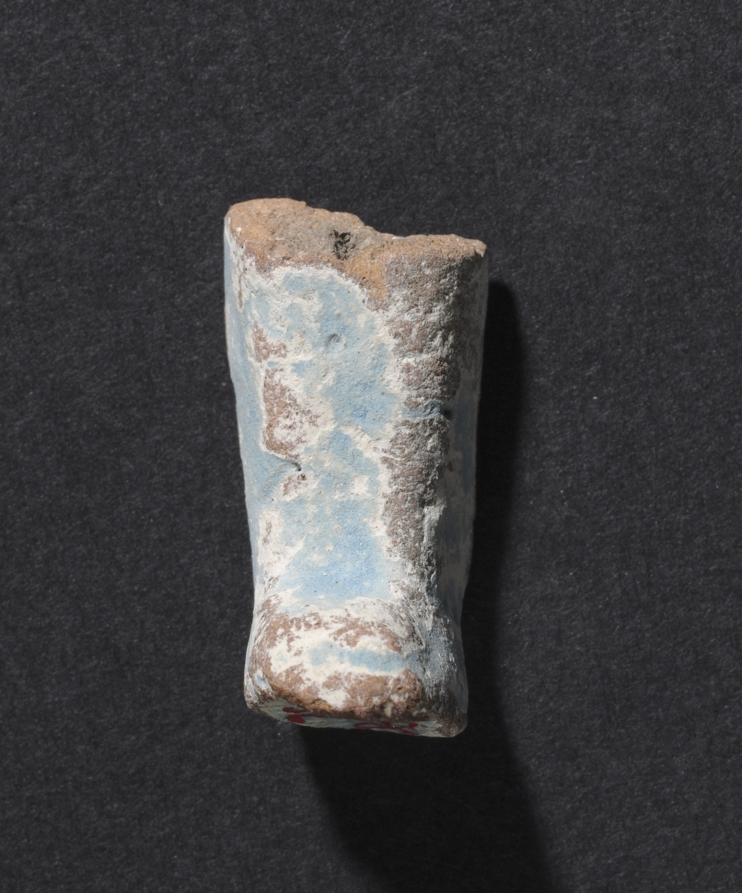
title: Shawabty of Ditamenpaankh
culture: Egypt, Late period (715–332 BCE), Dynasty 25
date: 715–656 BCE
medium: terracotta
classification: Funerary Equipment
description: High demand for shawabtys in the Late Period, a time when as many as 400 or more shawabtys were placed in the tomb with the deceased, gave rise to a specialized container for storing them: the shawabty box. This example is inscribed for the lady of the house, Ditamenpaankh, and was probably one of a pair originally made for her. The single-masted boat on the box's lid is perhaps an allusion to the pilgrimage of the deceased to the holy city of Abydos, the cult city of Osiris, king of the dead. The shawabtys inside are crude, mass-produced examples cast in an open mold. Made of terracotta, their blue paint imitates more costly shawabtys made of faience. As for the shawabty spell, it has been removed from its traditional location on the shawabty's front and relocated onto the sides of box, where it needed only to be written once, thus expediting production.